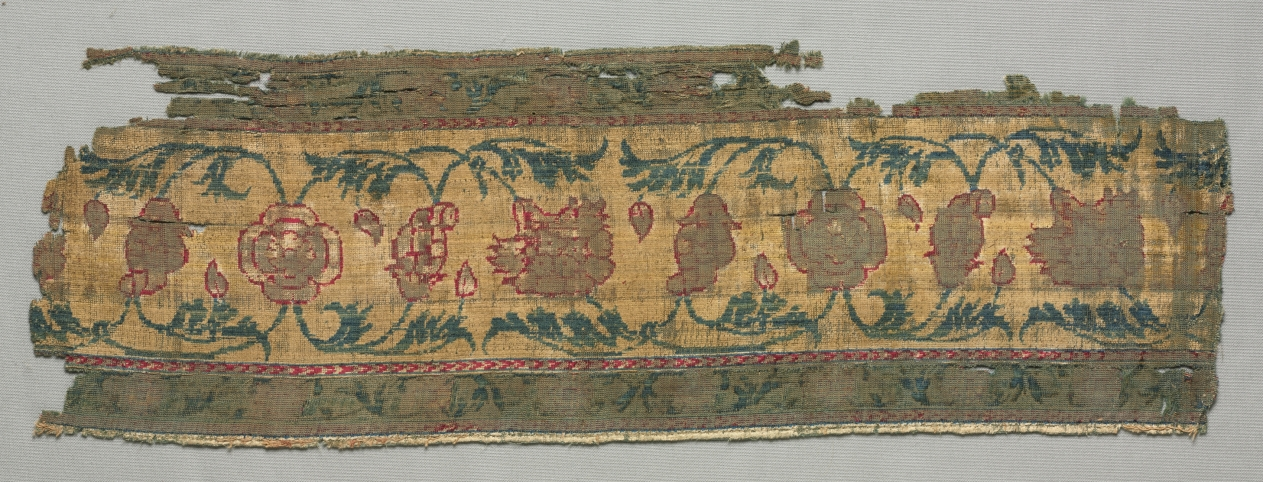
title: Fragment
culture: India, 6th-16th century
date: 500s–1500s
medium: velvet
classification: Velvet